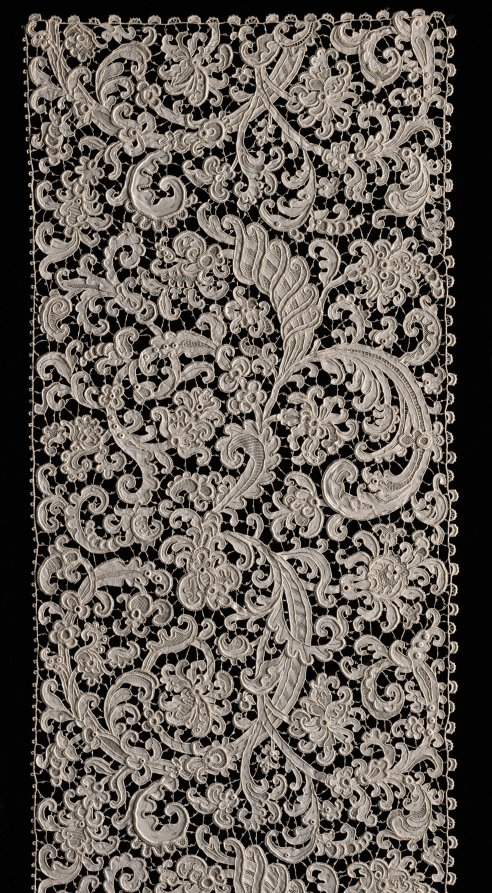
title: Lace Flounce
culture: Italy, Venice, 1650-1699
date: 1650–99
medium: Linen: needle lace (Venetian Raised Point)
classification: Lace